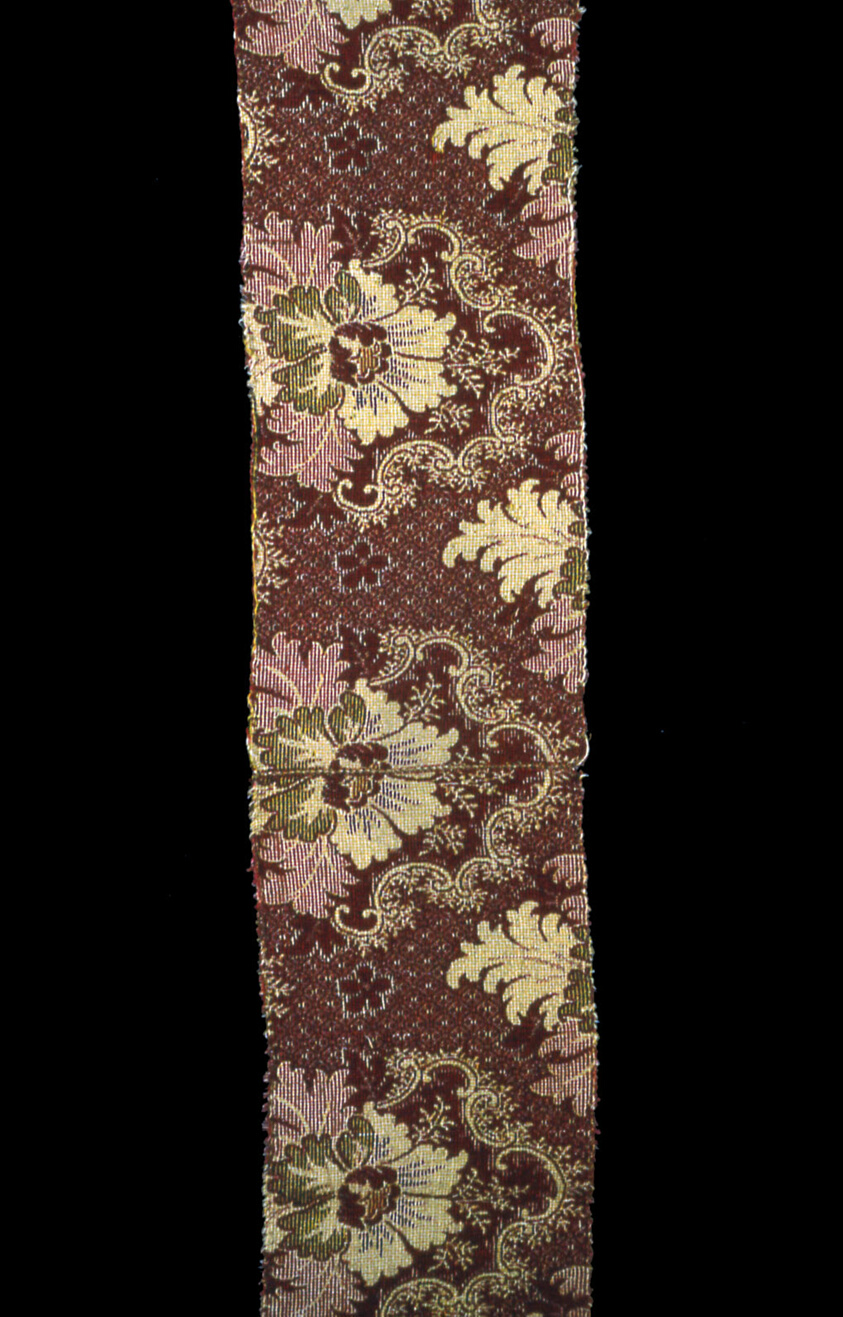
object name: Textile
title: Carpet Fragment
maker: United States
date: 1870s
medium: Wool, plain weave, tied and free double cloth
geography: United States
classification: weaving - carpet; textile